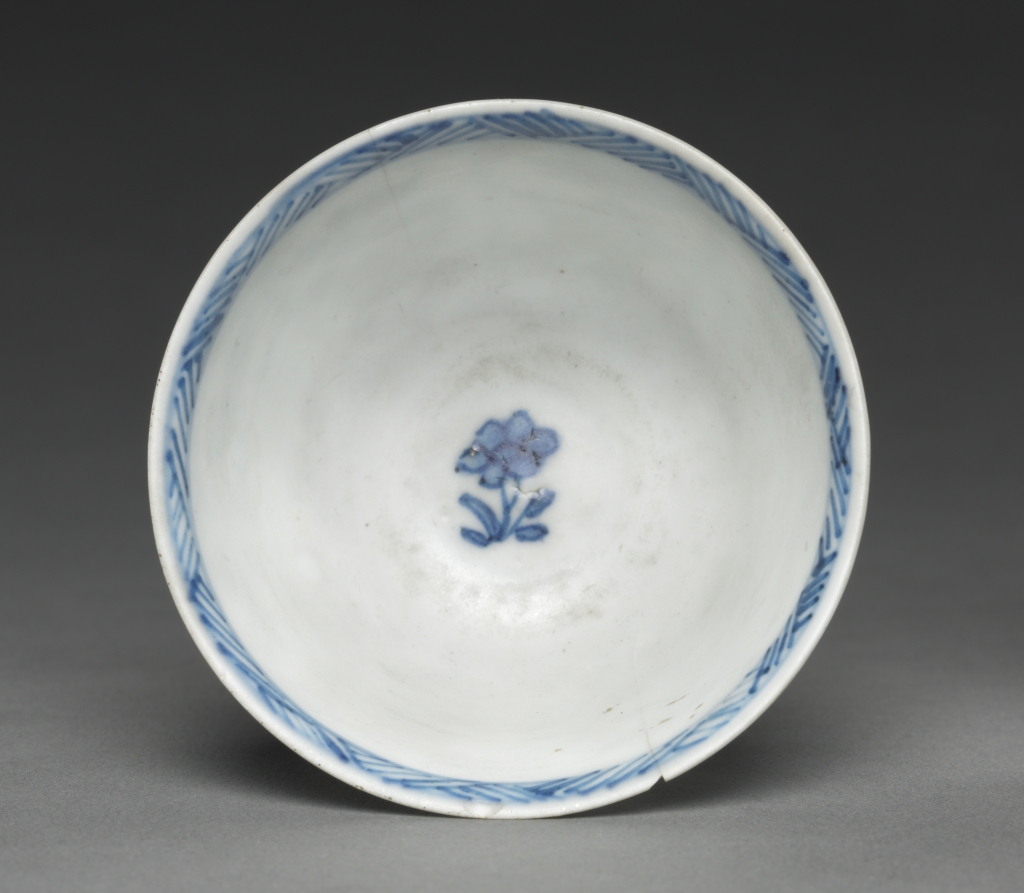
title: Tea Cup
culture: China, Qing dynasty (1644-1911)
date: c. 1690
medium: porcelain with blue and white decoration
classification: Ceramic